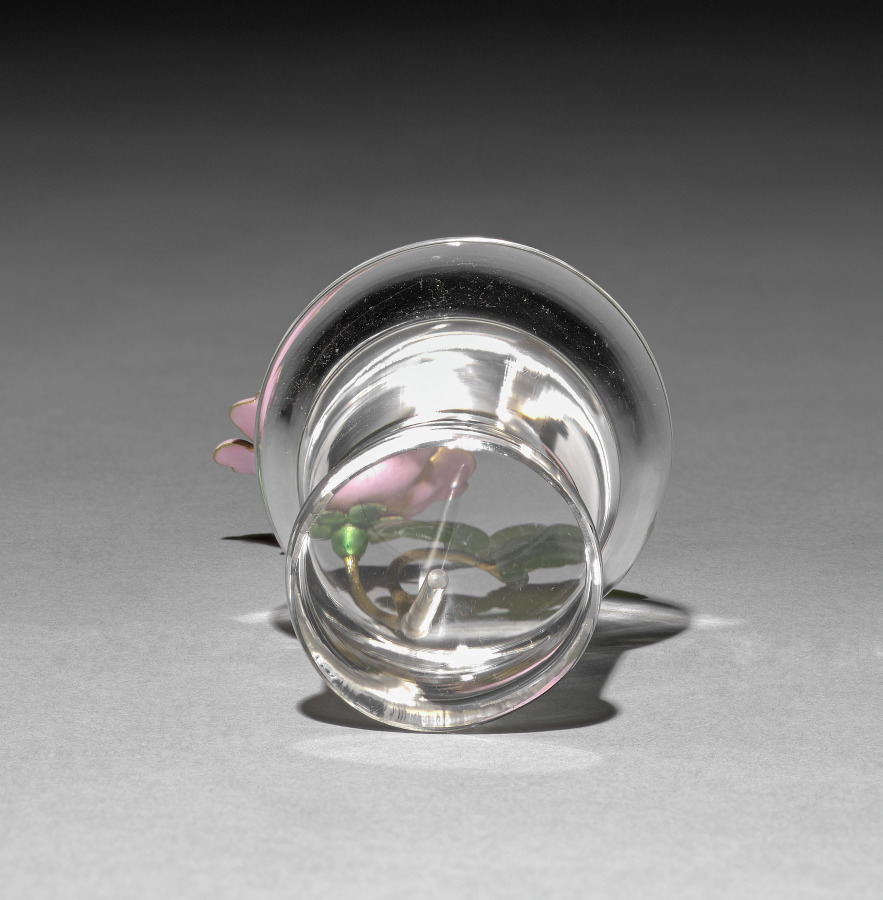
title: Flower Study of a Wild Rose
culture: Russia, St. Petersburg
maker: House of Fabergé (Russian, 1842–1918)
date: c. 1885–1915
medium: gold, silver, enamel, diamond, jade, rock crystal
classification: Miscellaneous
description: This delicate flower study resembles a stem of wild rose. Fabergé’s inspiration for his flower studies is said to have come from the floral brooches of precious stones that were made in the 1700s for Catherine the Great as well as from the Japanese art of flower arranging, known as ikebana. Small and delicate, Fabergé’s flower studies were given as intimate gifts to friends by the tsarina and others in the court. She also liked to take them around to wherever the imperial family was residing as a reminder of spring during the harsh Russian winters.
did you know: The stems of Fabergé’s flower studies are set into little basins carved from rock crystal to resemble pots of water.